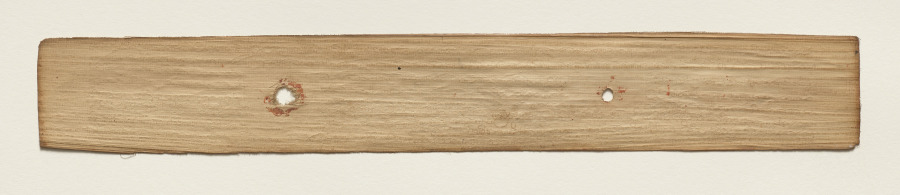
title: Leaf from a Buddhist Manuscript (recto)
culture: Sri Lanka, Singhalese, Late 17th century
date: c. 1700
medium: fiber paper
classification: Manuscript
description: Palm leaf material is still used for manuscripts in Sri Lanka. The palm leaves are prepared first by boiling them, drying them in the sun, and then rubbing them with oils. Scribes then use a metal stylus to incise the text. Then charcoal powder is wiped across the pages, filling in only the inscribed lines.